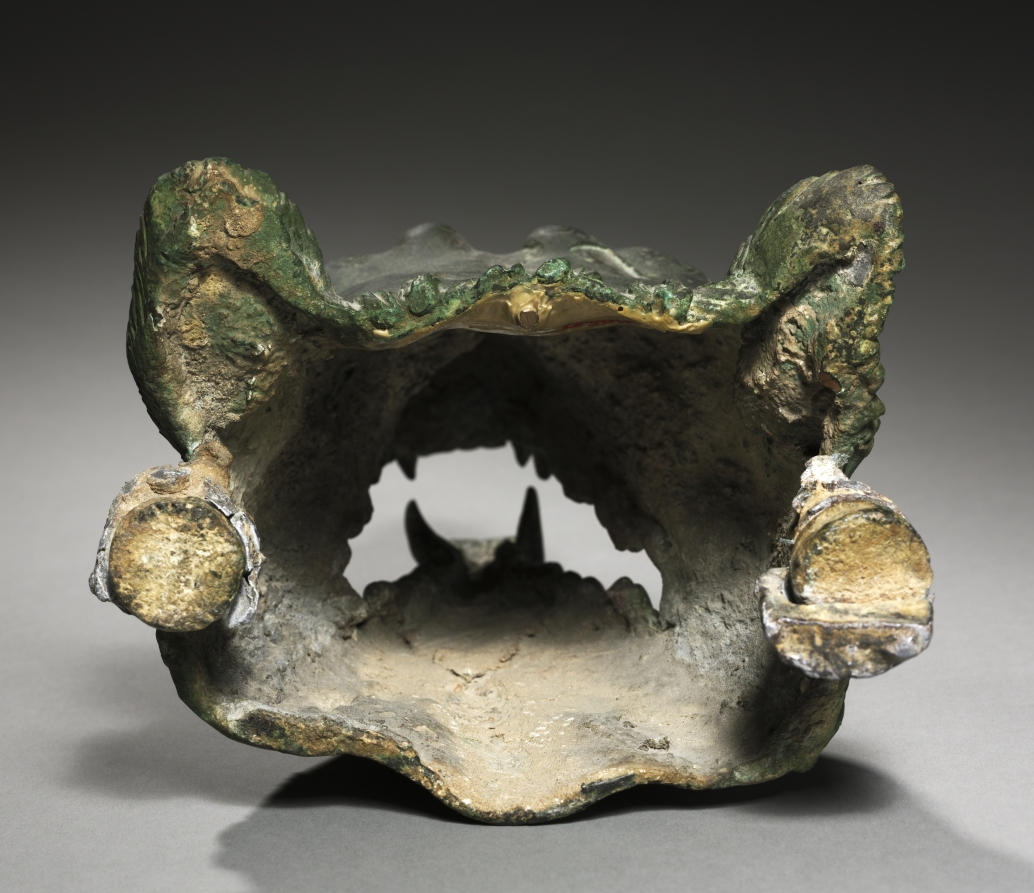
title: Wolf-Head Barge Fixture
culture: Italy, Rome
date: 1–100 CE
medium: bronze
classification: Sculpture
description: This snarling wolf head is closely similar to others that were attached to a luxurious pleasure barge moored on Lake Nemi, near Rome. The ship was designed as a floating platform for elaborate parties, and included impressive bronze fittings to ornament the wooden structure. Beam ends were capped with lion, panther, and wolf heads, each with a large bronze ring between its teeth.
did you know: The wolf is an important symbol of Rome, having reared its mythical founders, Romulus and Remus.